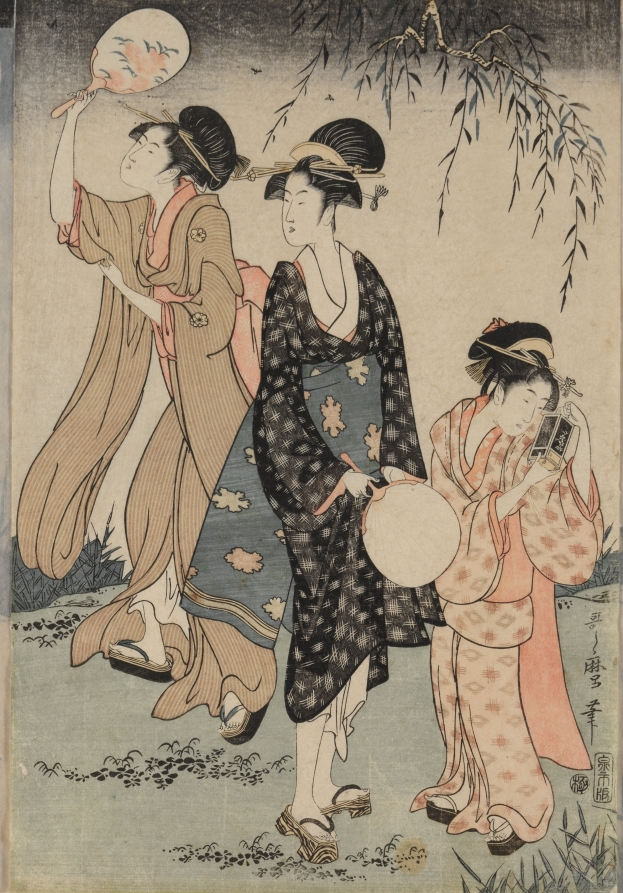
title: Catching Fireflies Beneath a Willow Tree (center)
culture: Japan, Edo period (1615–1868)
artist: Kitagawa Utamaro (Japanese, c. 1754–1806)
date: c. 1796–97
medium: Triptych: color woodblock print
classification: Print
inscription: Artist's signature: Utamaro hitsu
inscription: Publisher: Izumiya Ichibei (Senichi han). Censorship seal: kiwame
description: Caught up in a frenzied pursuit of fireflies, one boy has waded into a stream after his quarry, while a younger one watches in anticipation as a young woman thrusts her fan into the air in the hope of capturing hers. In the center of the composition, a girl examines the insects trapped in her elegantly carved cage.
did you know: A sense of movement is conveyed by their sleeves fluttering in the breeze.